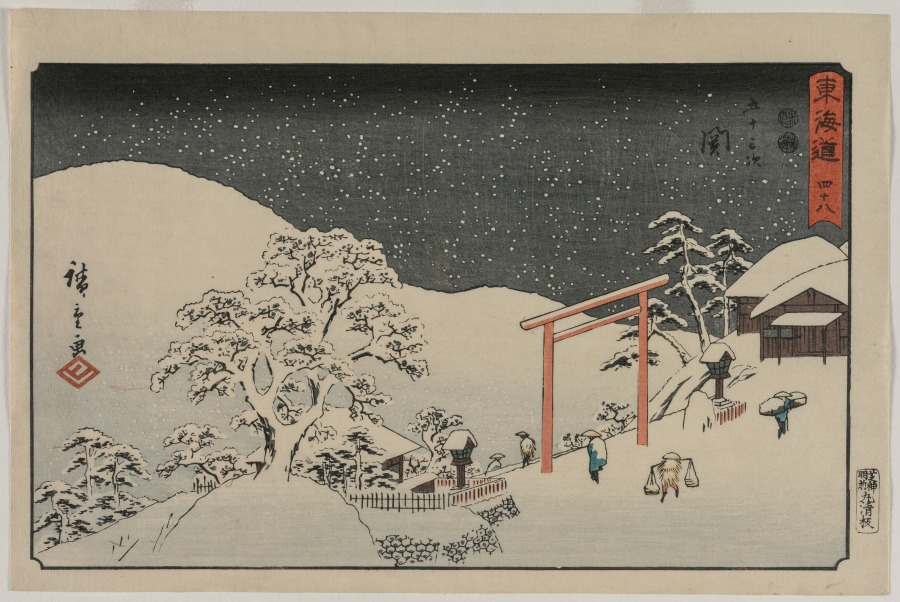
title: Seki, from the series The Fifty-Three Stations of the Tōkaidō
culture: Japan, Edo period (1615–1868)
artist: Utagawa Hiroshige (Japanese, 1797–1858)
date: c. 1848–49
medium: Color woodblock print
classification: Print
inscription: Signature: Hiroshige ga Artist Seal: Hiro Publisher: Maruya Seibei (Marusei han, Shiba Shimmei Mae) Censorship Seal: Mera, Watanabe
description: This print from one of Hiroshige’s later Tōkaidō series completely reconceives the scene at Seki. An earlier series showed an entourage of a daimyō, preparing to leave an inn, but this view plunges the station into the depths of a dark winter. Daimyō were regional military rulers during Japan’s Edo period. As the central government required them to live in the capital, Edo, in alternating years, daimyō processions along the Tōkaidō thoroughfare were a frequent sight. This print, however, emphasizes the pilgrimage route to Japan’s principal site of religious worship, the Ise Shrine, indicated by the traditional red gate to the shrine.